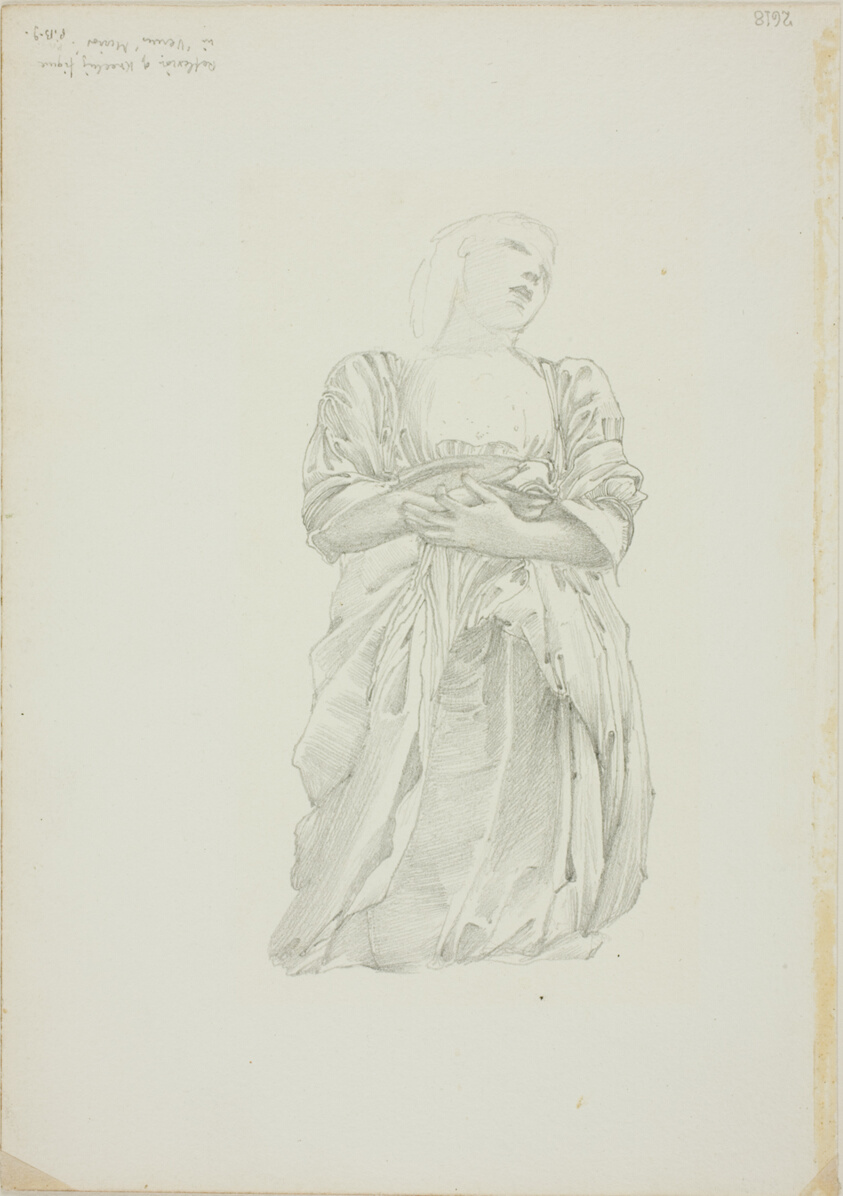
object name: Drawing and Watercolor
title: Reflection of Kneeling Female Figure, study for The Mirror of Venus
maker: Sir Edward Burne-Jones (English, 1833-1898)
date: c. 1873–77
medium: Graphite on ivory wove paper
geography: England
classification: graphite; drawings (visual works); prints and drawing